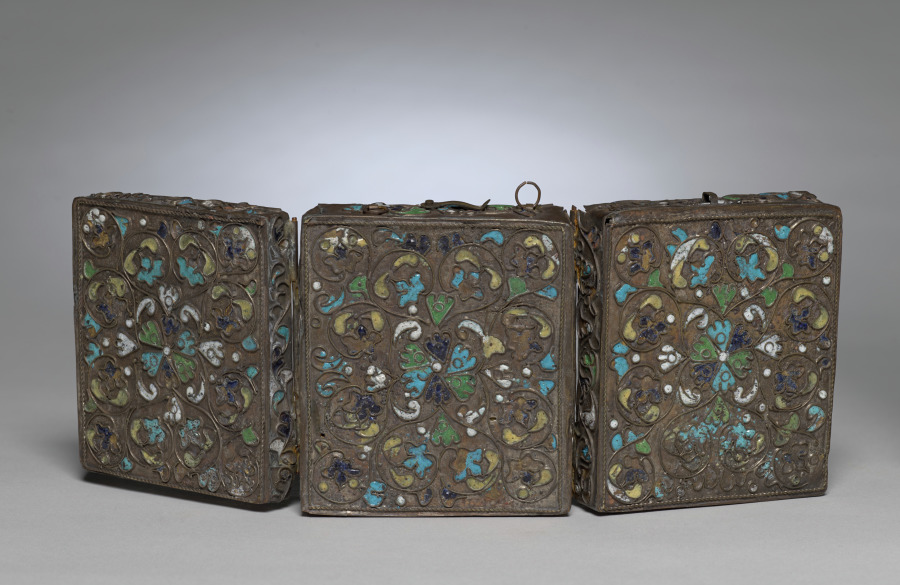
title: Triptych with Christ, the Virgin, and St. John the Evangelist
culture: Russia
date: 1800s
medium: pigment on wood, in cloisonné enamelled insert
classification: Painting